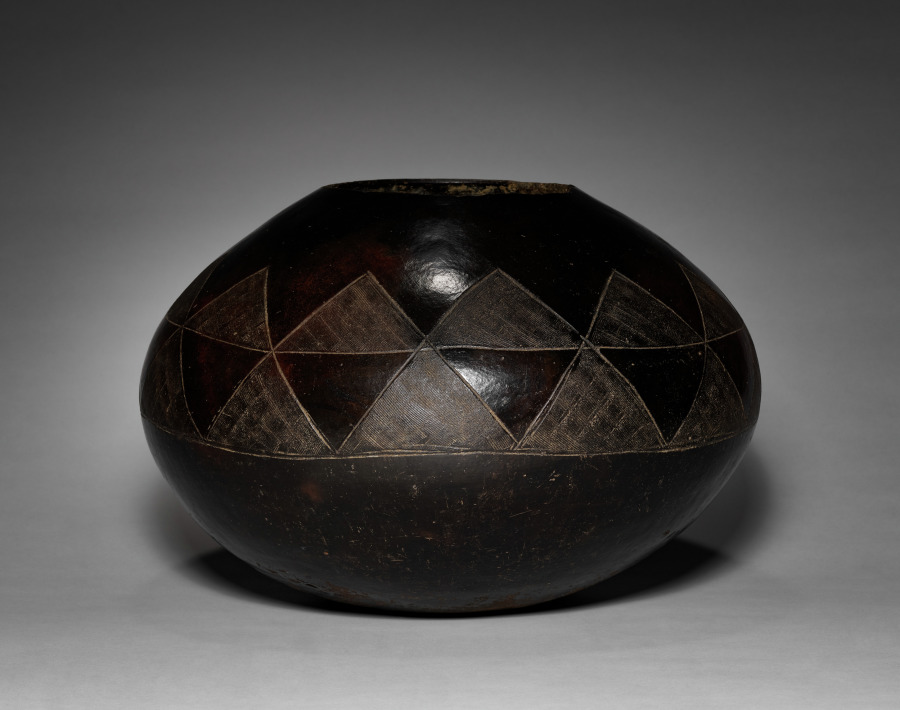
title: Pot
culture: Africa, Southern Africa, South Africa, Zulu-style potter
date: 1900s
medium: Terracotta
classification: Vessels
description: This large, beautifully shaped vessel was used for the serving of beer, an essential component of Zulu hospitality. Undecorated vessels were for private household use, and ornamented examples were reserved for guests. Zulu pottery is produced by women, and is typically thin-walled, with a burnished black surface. Decoration may be incised around the shoulder, as in this example, or may consist of raised bumps that resemble body scarification. The basketry lid protects the vessel's contents from flies or debris; contemporary pot lids are often woven of telephone wire with a colorful plastic coating